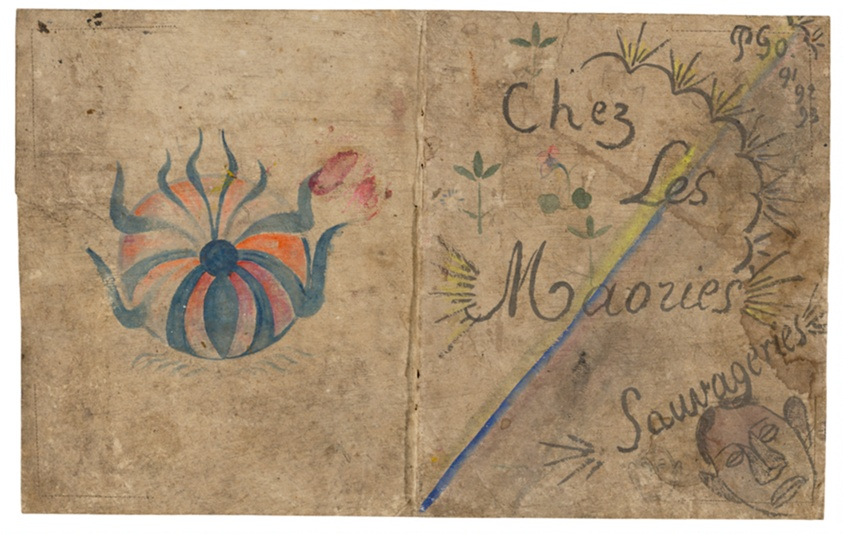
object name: Drawing and Watercolor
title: Chez les Maories: Sauvageries (At Home with the Maori: Savage Things)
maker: Paul Gauguin (French, 1848-1903)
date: 1893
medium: Watercolor, with traces of black crayon and graphite, on tapa, partially laid down on cream wove paper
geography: France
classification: gouache; drawings (visual works); prints and drawing